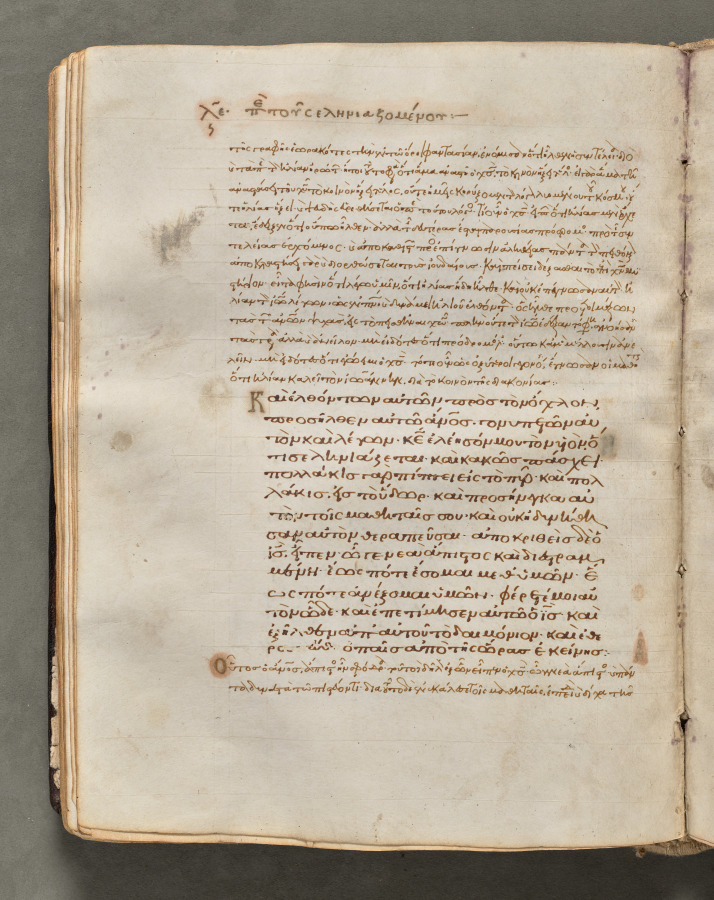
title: Text, folio 77 (verso), from a Gospel Book with Commentaries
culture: Byzantium, Constantinople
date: c. 1000–1100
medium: ink, tempera, and gold on vellum; leather binding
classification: Bound Volume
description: Each of the four gospels in this book opens on a page with brilliantly illuminated borders depicting the author of the text as well as birds-principally peacocks, symbols of the immortality of the soul-and fountains, representing the fountain of life and the salvation of the soul. This volume consists of 428 leaves with texts in Greek. Its level of sophistication suggests that it was probably written and decorated in a monastery in Constantinople.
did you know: Gospel Books were carried in procession through Byzantine churches.